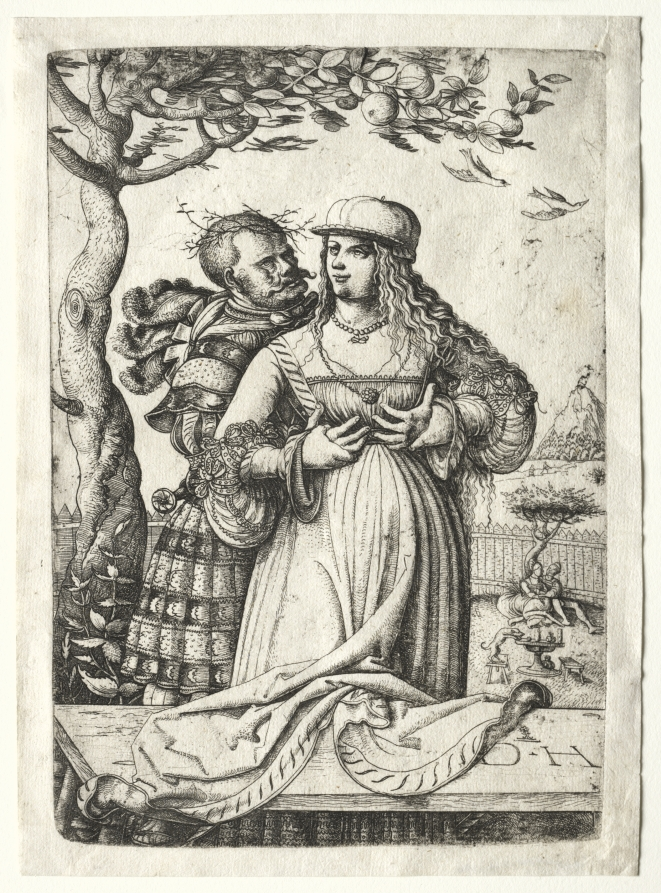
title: Soldier Embracing a Woman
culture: Germany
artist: Daniel Hopfer (German, c. 1470–1536)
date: 1505–36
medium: etching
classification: Print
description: In this image, a couple embraces in a garden. The man’s dress indicates that he is a German mercenary, who were chastised for loose morals in many prints of the period. The twiglike laurel wreath on his head is a mocking emblem of victory in love and war. His partner meets his gaze and guides his hands, wearing long hair, an open bodice, and a hitched-up skirt suggesting sexual availability. Resonating with Edenic and love garden images, the subject likely operated on the edge of decency for its audience.